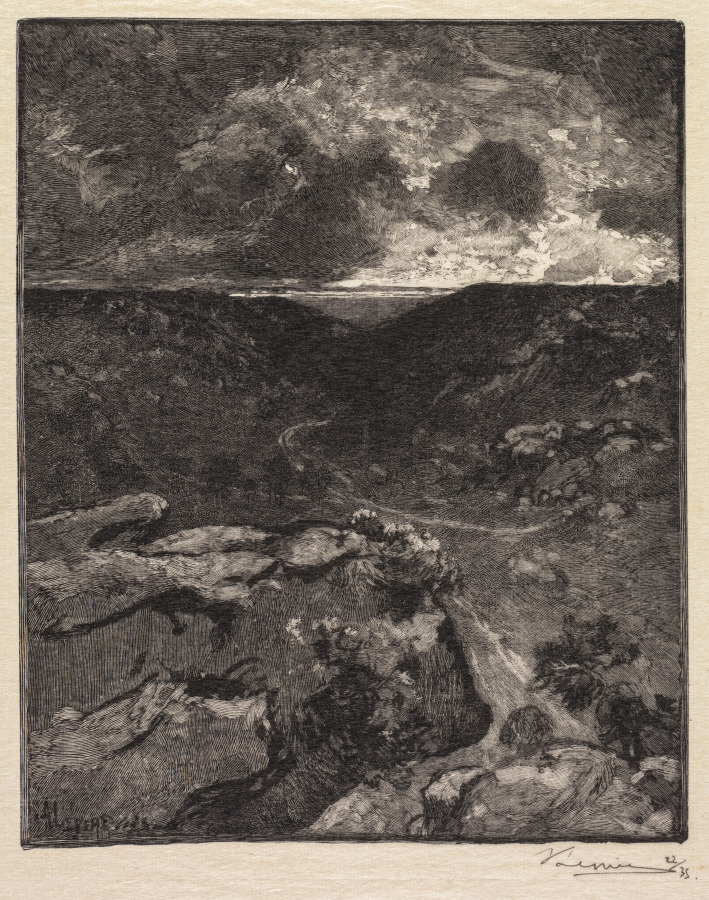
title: Fontainebleau Forest: Franchard Valley (La Forêt de Fontainebleau: La Vallée de Franchard)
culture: France, 19th century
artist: Auguste Louis Lepère (French, 1849–1918)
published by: A. Desmoulins, Published in Revue Illustrée, 1887–90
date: 1890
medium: wood engraving from bound volume of 34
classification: Bound Volume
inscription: In block, lower left: A. LEPÈRE; below image, lower right, in black ink: ALepère 22/35; on window mat, lower right, in graphite: La vallée de Franchard